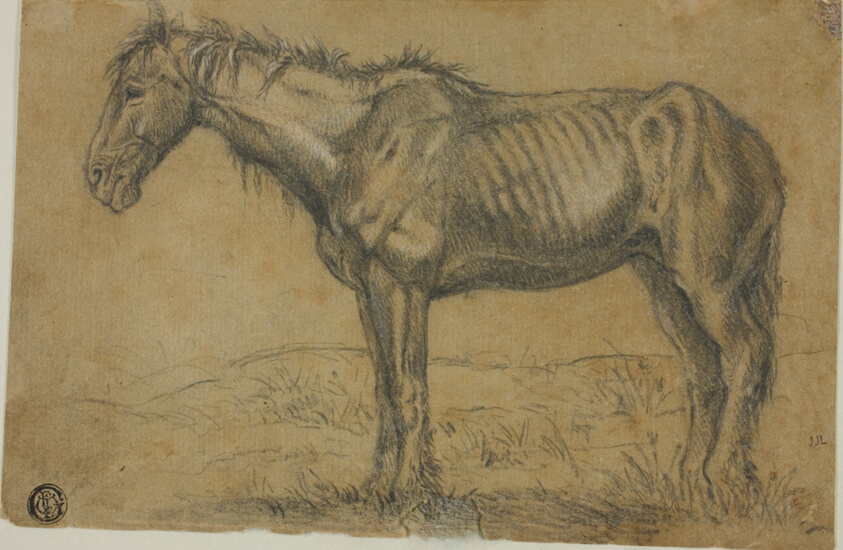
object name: Drawing and Watercolor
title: Emaciated Horse (recto); Frontal View of a Horse (verso)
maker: Charles Émile Jacque (French, 1813-1894)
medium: Black chalk, with charcoal, heightened with touches of white chalk, over graphite, selectively varnished with gum arabic (recto) and graphite (verso) on brown laid paper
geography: France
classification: chalk; drawings (visual works); prints and drawing